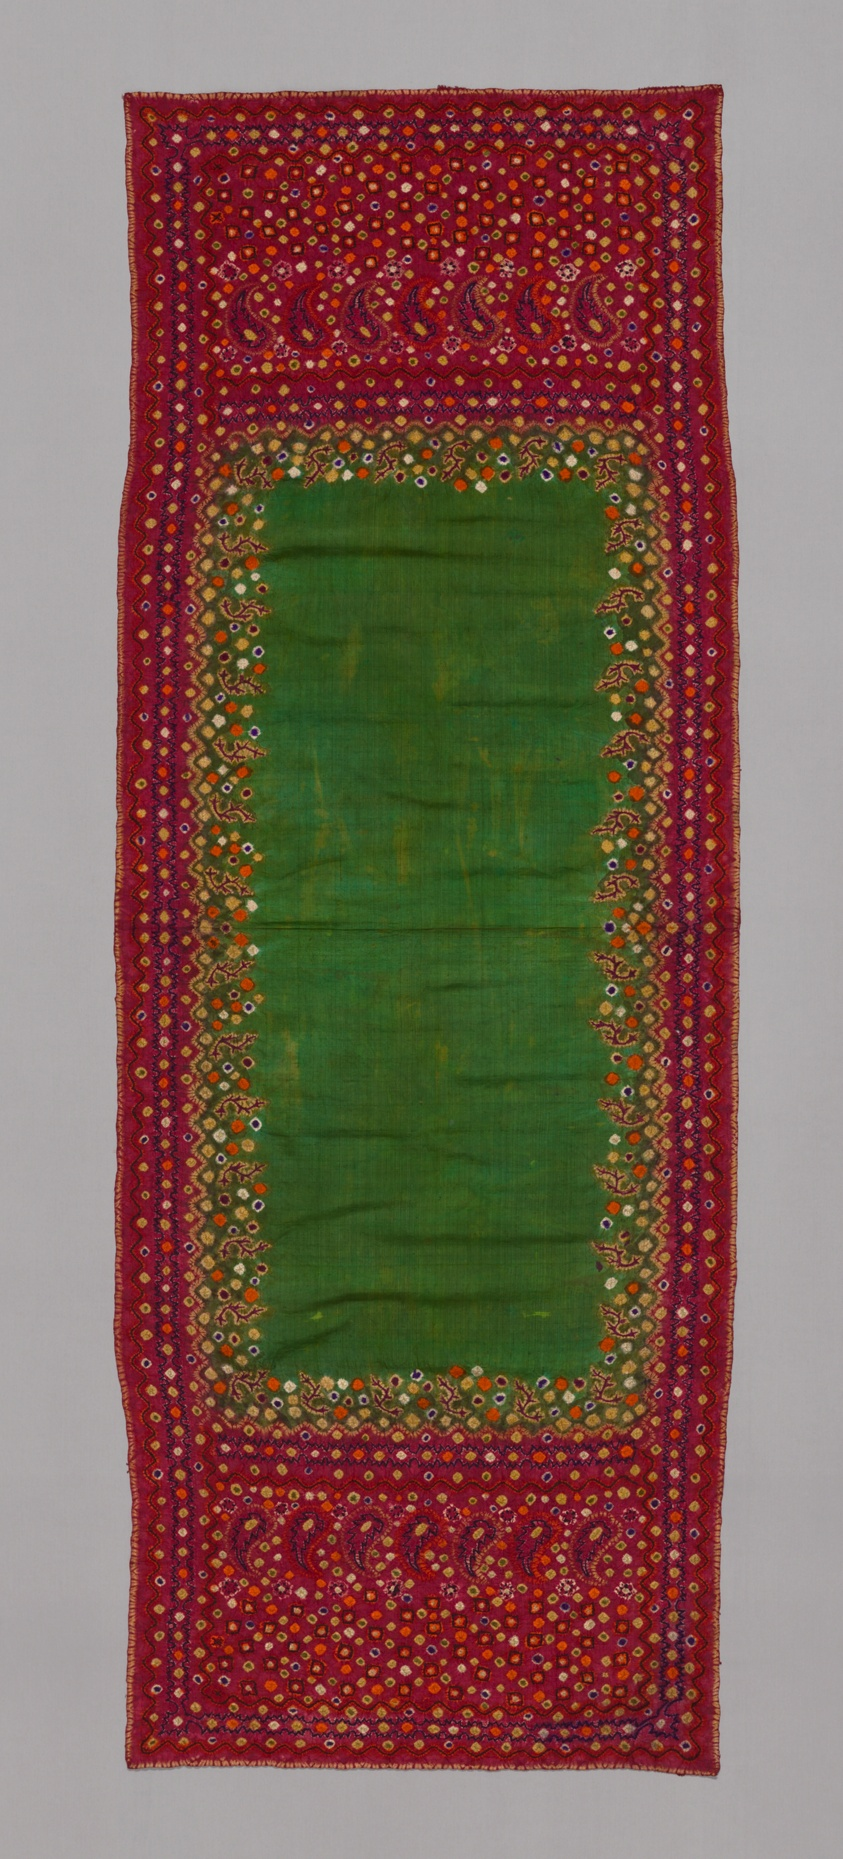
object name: Costume and Accessories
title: Head Scarf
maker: Northern India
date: 19th century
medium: Silk; tye-dyed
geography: India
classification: textile; weaving - printed; costume; dress (garment); clothing